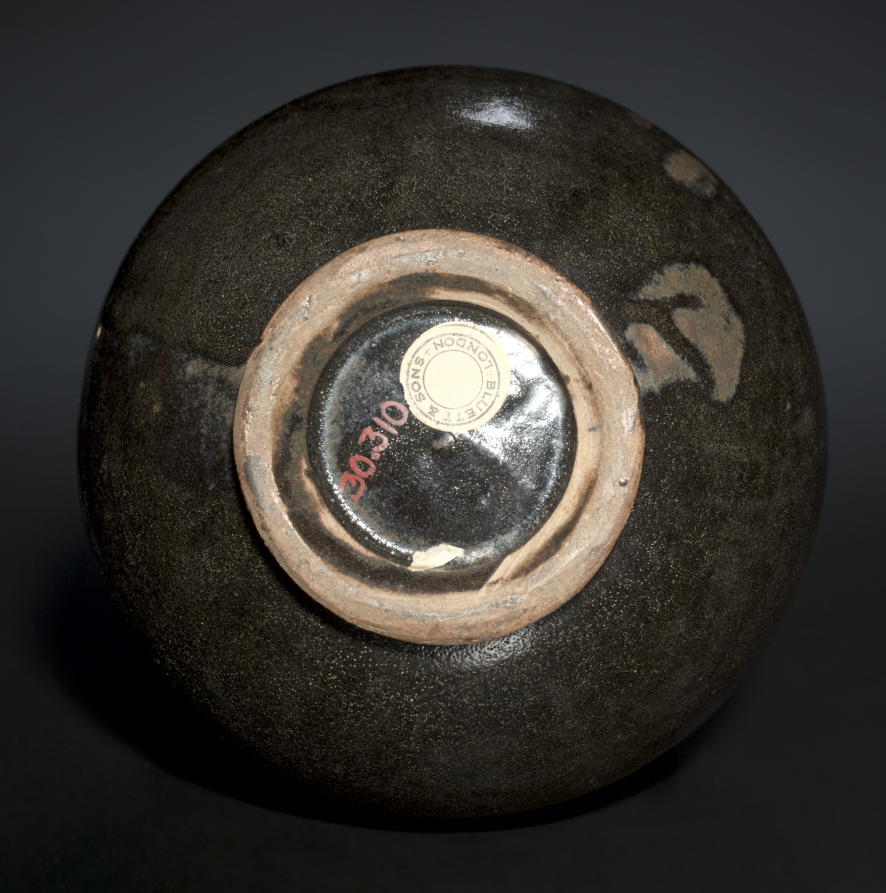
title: Bottle Vase: Black Ware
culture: Northern China, Jin dynasty (1115-1234) - Yuan dynasty (1271-1368)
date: 1200s-1300s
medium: glazed stoneware with underglaze slip coating and iron oxide decoration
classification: Ceramic